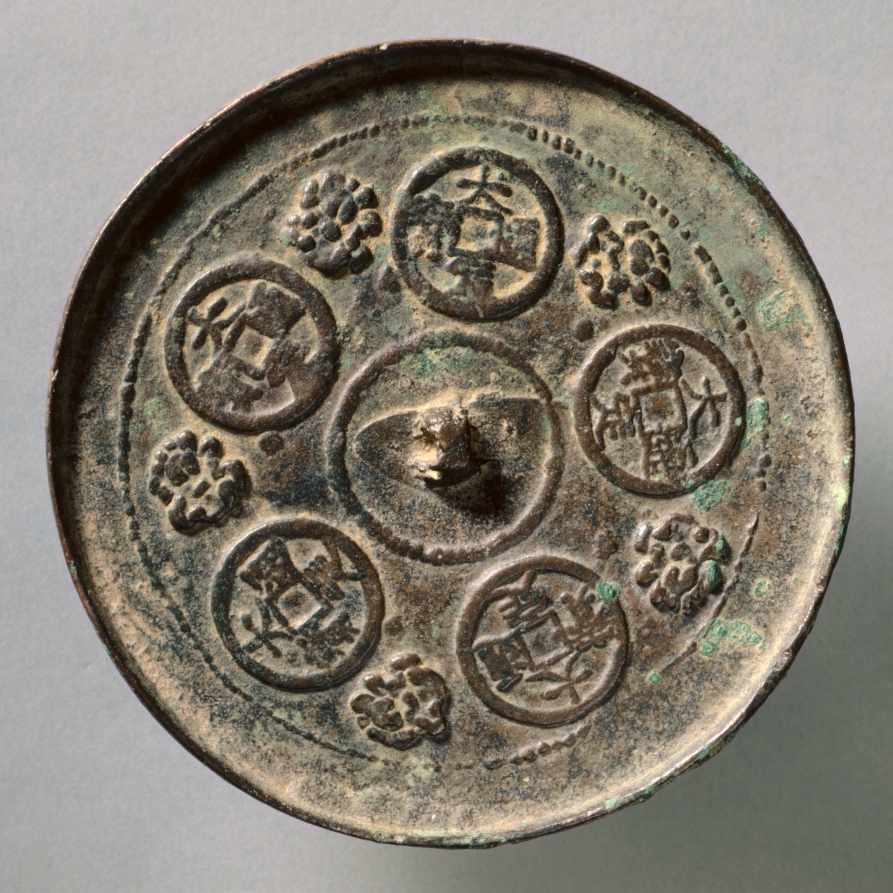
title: Mirror Featuring Dading Coins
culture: China, Jin dynasty (1115-1234)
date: c. 1178–1234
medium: bronze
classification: Metalwork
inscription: 大定通寶